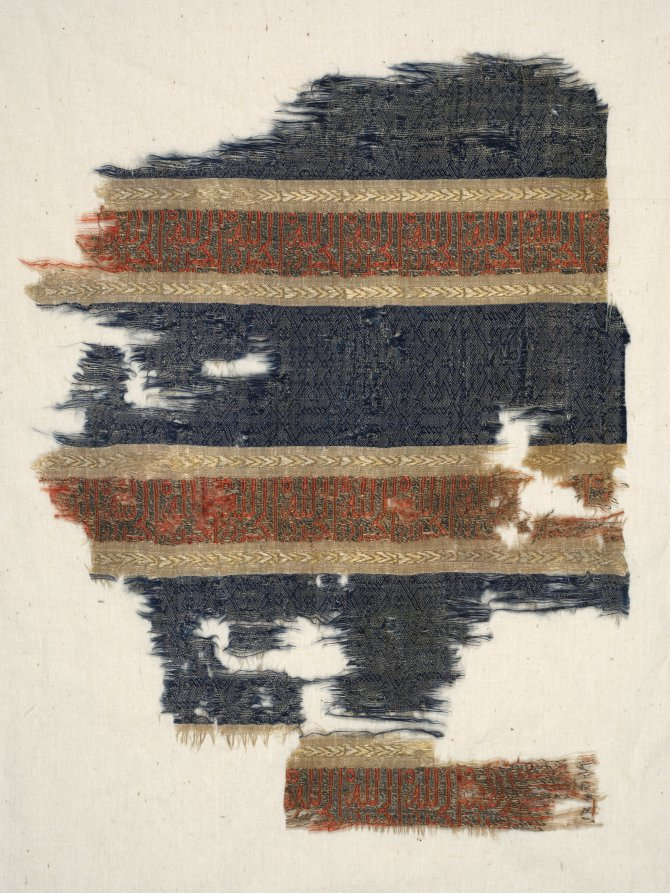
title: Silk fragment with decorated and inscribed bands, from the tomb of Don Felipe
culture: Spain, probably Almeria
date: 1200s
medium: Silk: plain weave with supplementary weft, silk and silver thread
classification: Textile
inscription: band of Naskhi inscription of red on silver which reads: "Praise be to God."